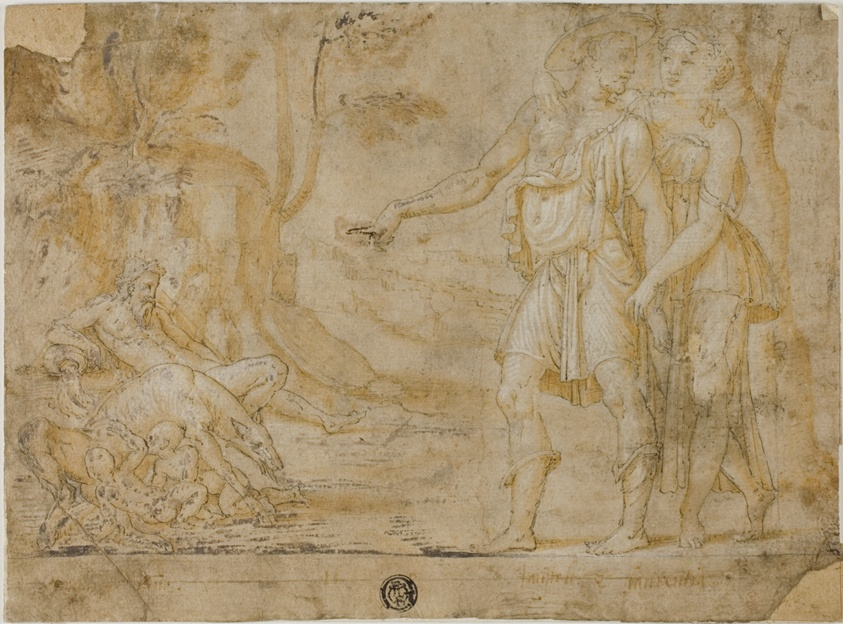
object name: Drawing and Watercolor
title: Faustulus and Merentia Discover Romulus and Remus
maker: Possibly school of Fontainebleau (French, 16th century); or an unknown Netherlandish artist (16th century)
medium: Pen and black ink and brush and pale orange wash, heightened with lead white (discolored), on tan laid paper, laid down on cream laid paper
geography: France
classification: pen and ink drawings; drawings (visual works); prints and drawing